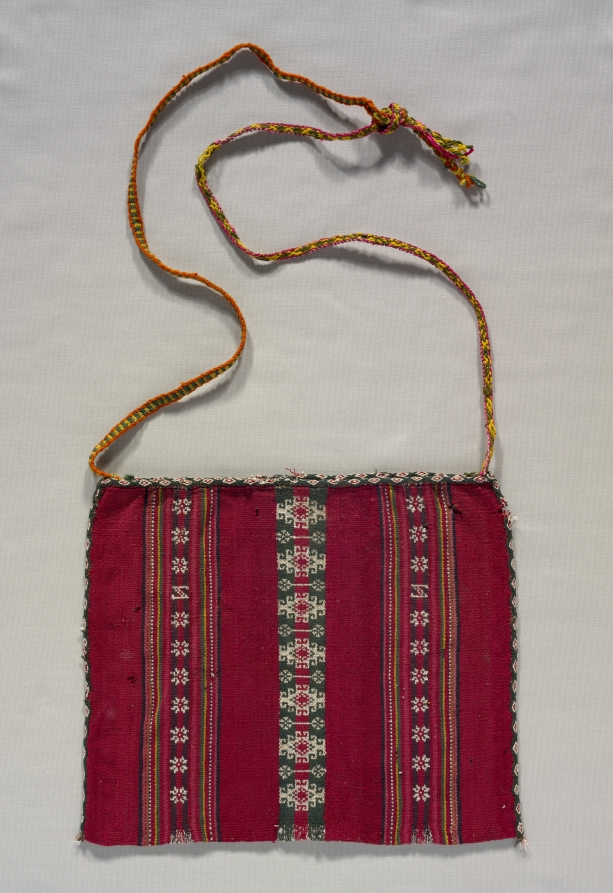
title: Pouch (Bolsa)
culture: Bolivia, Choclla, early 20th century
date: c. 1900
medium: wool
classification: Textile